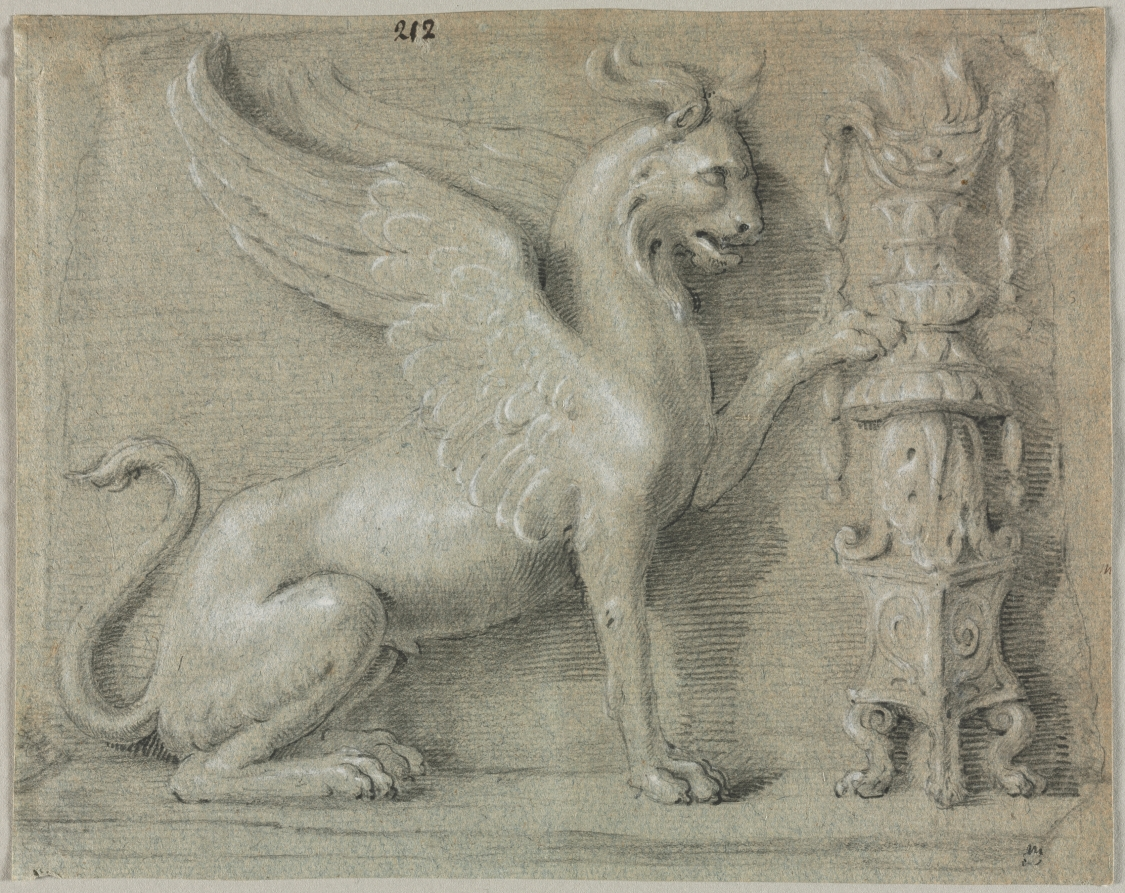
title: A Griffin Relief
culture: France, 18th century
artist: Anonymous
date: 1700s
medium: black chalk, black crayon, and pen and black ink? heightened with white chalk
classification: Drawing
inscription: upper left, in balck ink: 212 ; lower right, in black ink: m (collector's mark?) ; VERSO, upper left, in grpahite: 99 [sideways] ; lower right, in graphite: R2267 ; lower right, in graphite: 27